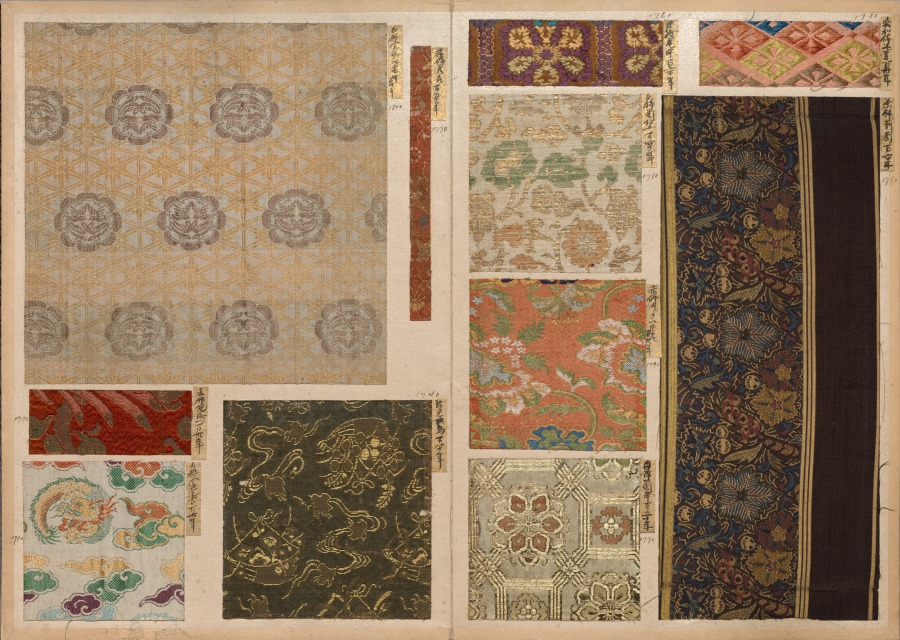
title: Album of Textile Samples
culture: Japan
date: 1790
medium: silk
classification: Textile